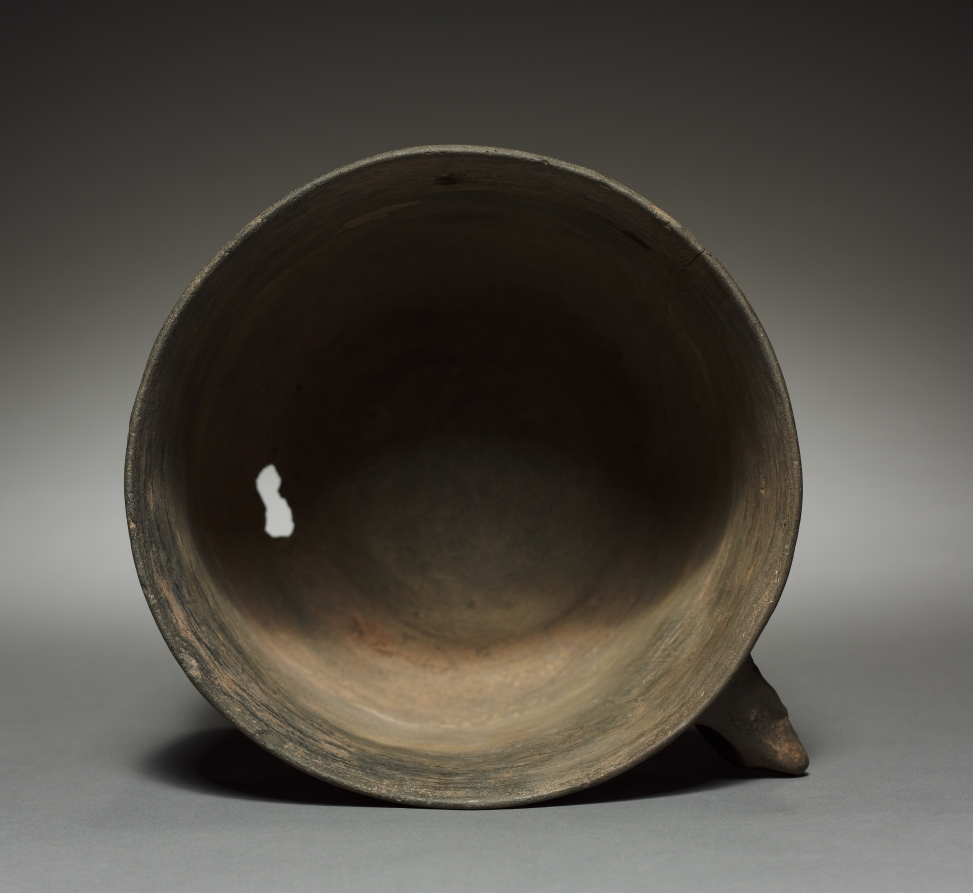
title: Drinking Vessel with Handle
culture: Argentina, Cienga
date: c. 600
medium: earthenware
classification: Ceramic